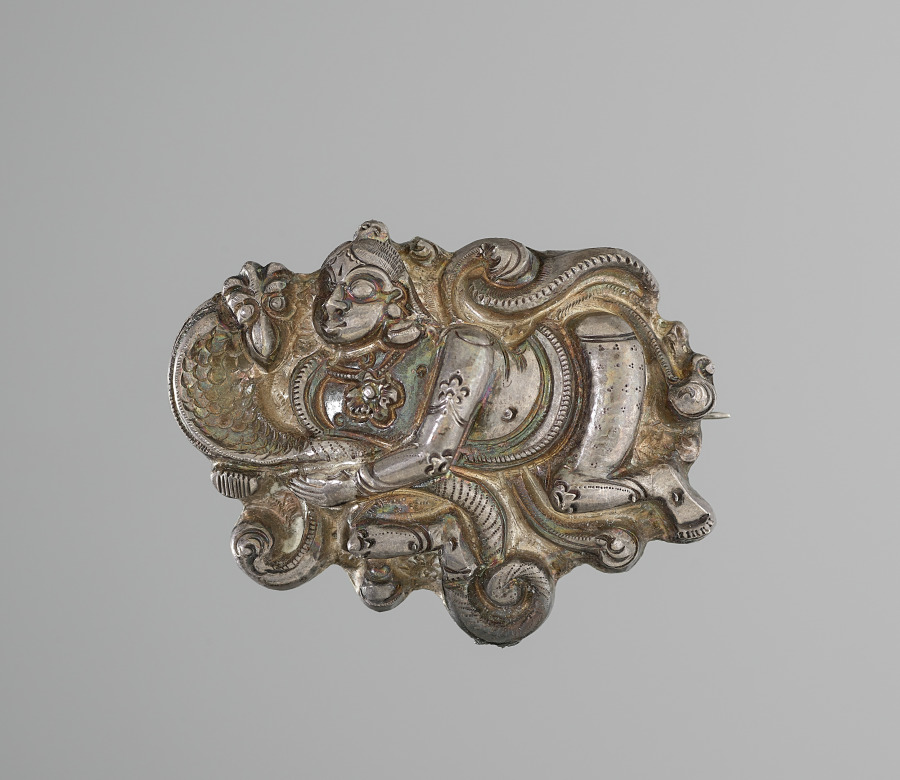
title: Brooch with Garuda and Naga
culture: India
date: 1800s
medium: silver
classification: Jewelry